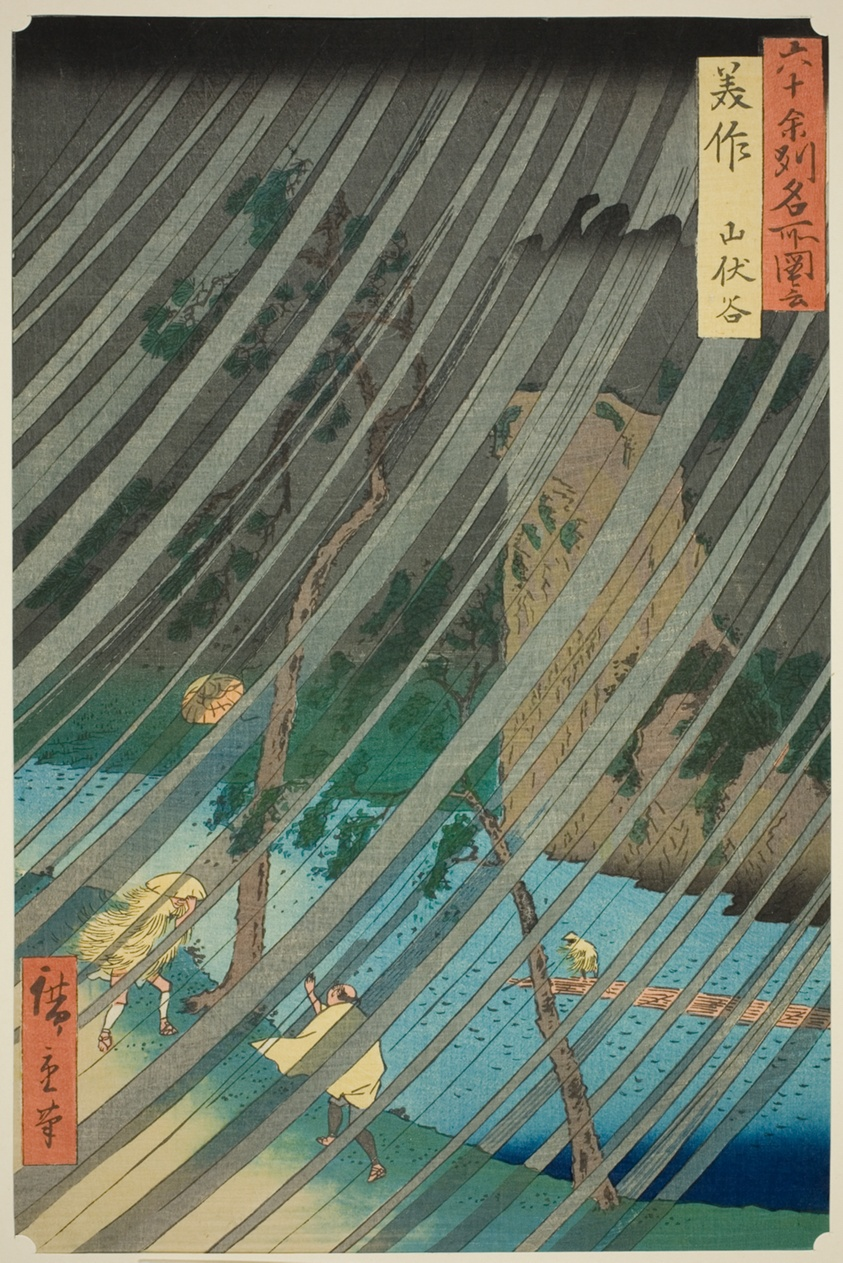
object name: Print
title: Mimasaka Province: Yamabushi Valley (Mimasaka, Yamabushidani), from the series "Famous Places in the Sixty-odd Provinces (Rokujuyoshu meisho zue)"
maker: Utagawa Hiroshige 歌川 広重; Japanese, 1797-1858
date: 1853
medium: Color woodblock print; oban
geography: Japan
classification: woodblock print; print; asian art